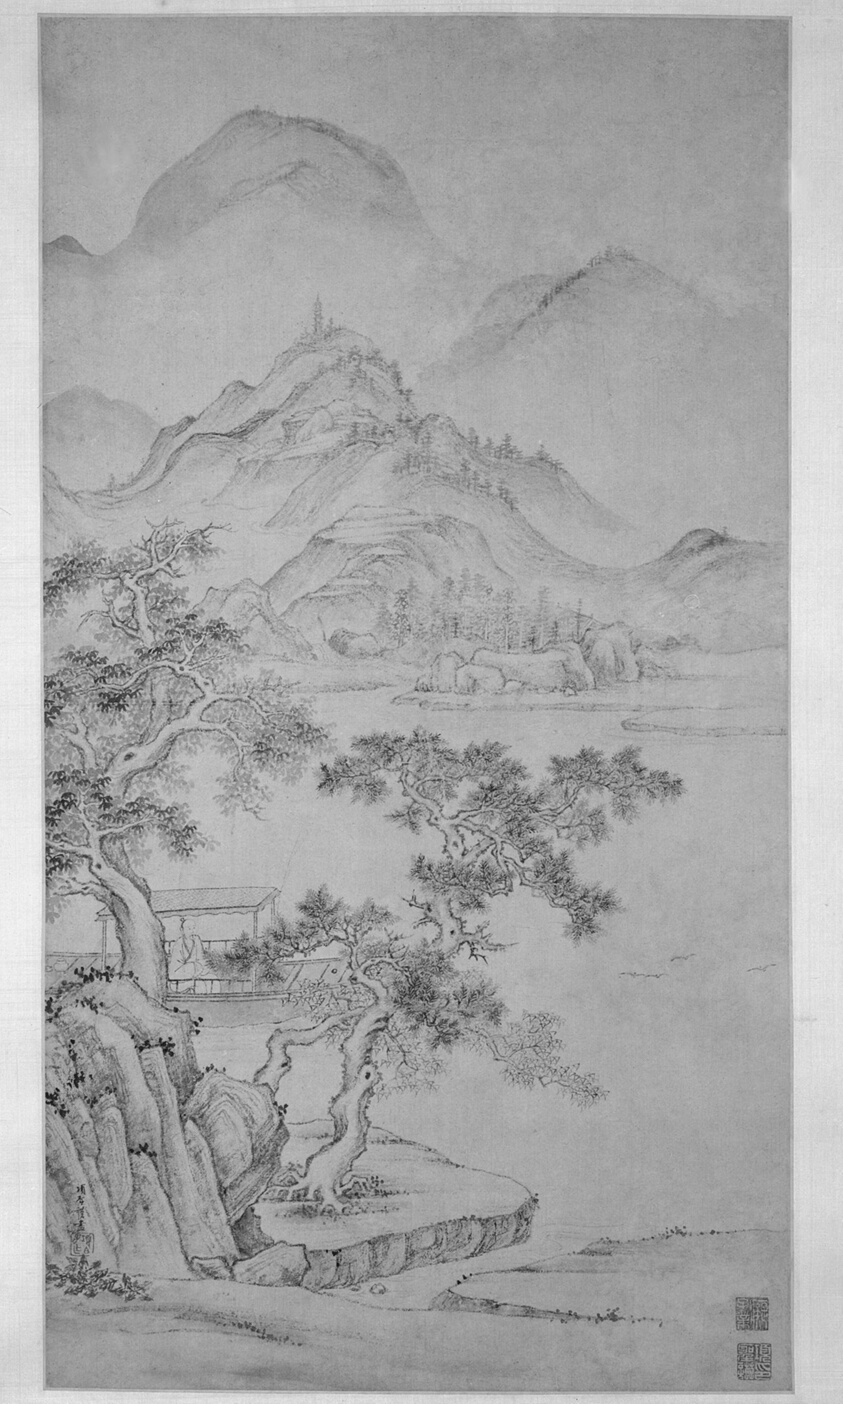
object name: Painting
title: River and Mountain Landscape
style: Chinese (culture or style)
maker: Xiang Shengmo (Chinese, 1597-1658)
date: Ming dynasty (1368–1644)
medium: Hanging scroll; ink on paper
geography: China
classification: hanging scroll; painting; asian art